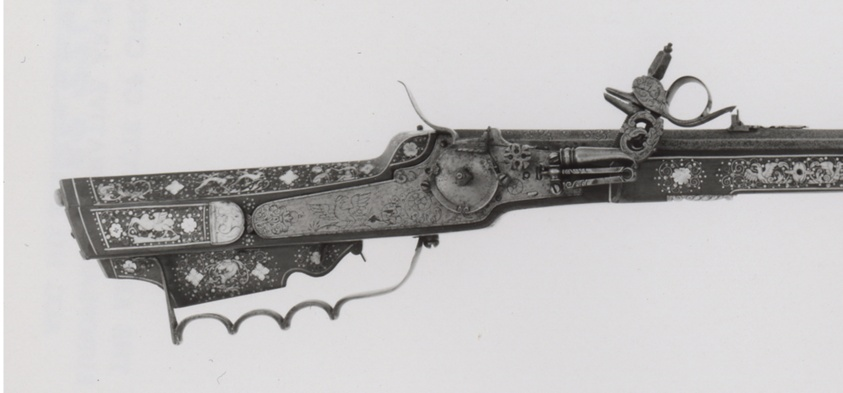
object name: Arms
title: Wheellock Hunting Rifle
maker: Polish, Silesia, Teschen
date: 1660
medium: Steel, gilded brass, iron, wood, horn, and mother-of-pearl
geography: Teschen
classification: firearm-long gun; arms; arms and armor